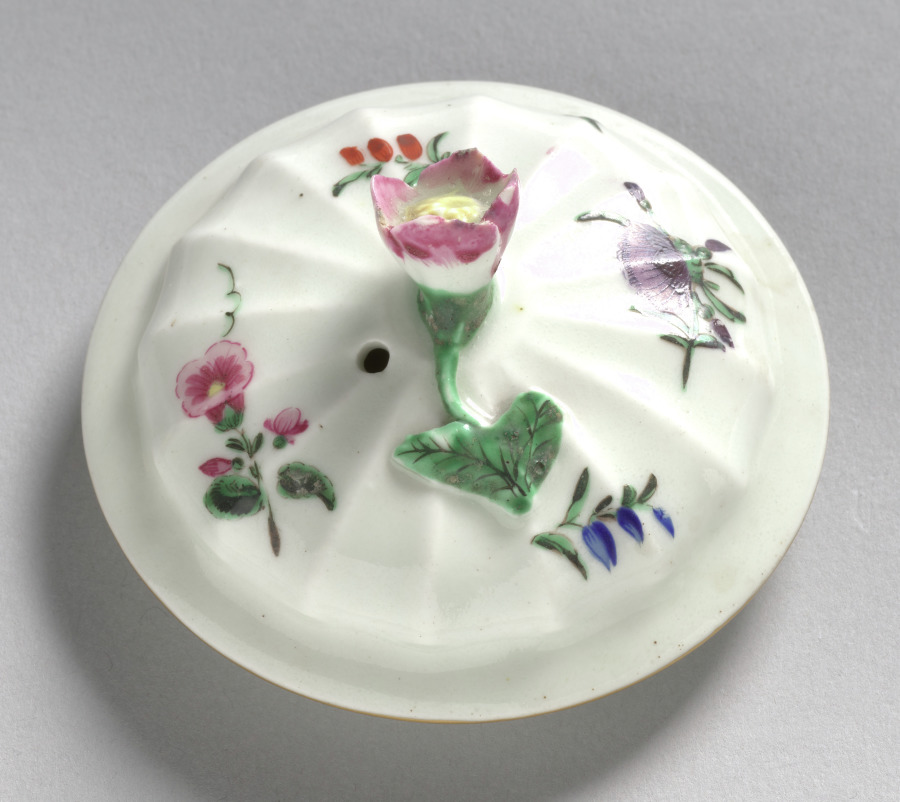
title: Lid for a Teapot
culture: England, Worcester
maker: Worcester Porcelain Factory (British, established 1751)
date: c. 1755–75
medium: porcelain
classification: Ceramic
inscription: Mark on the bottom - An X with radiating lines inside a box.